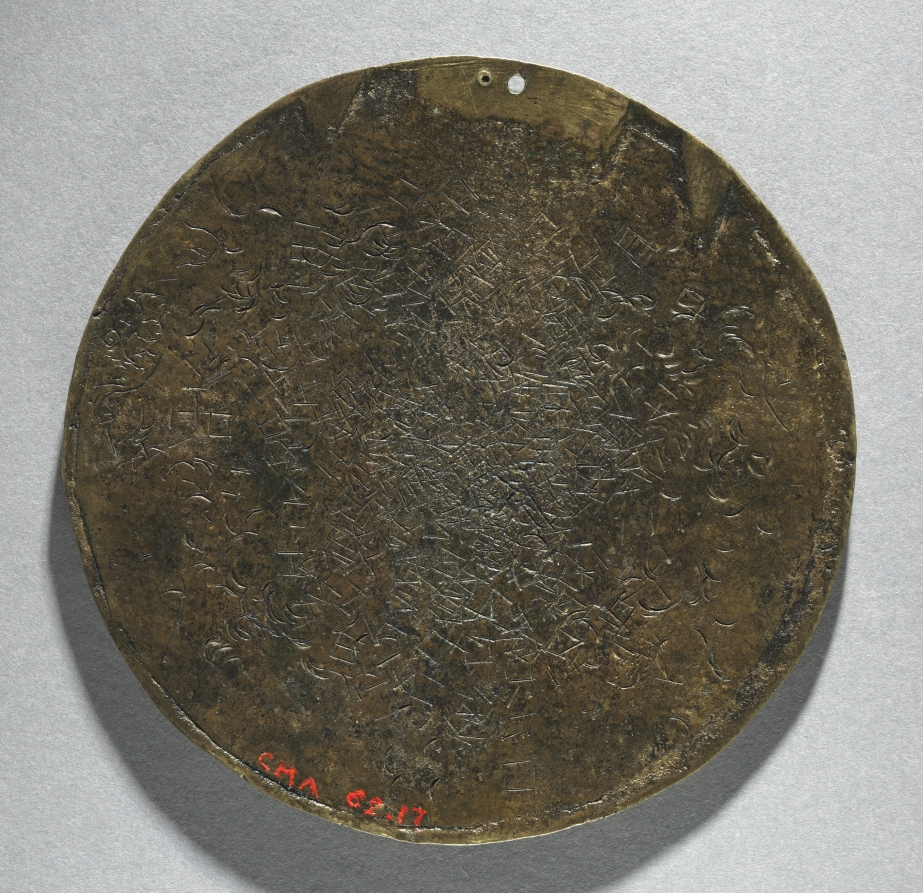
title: The Death of Hippolytus or Fall of Phaeton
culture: Italy, 16th century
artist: Moderno (Italian, 1467–1528)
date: 1500s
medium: bronze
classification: Sculpture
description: This composition's drama comes from the horses' twisting bodies—rhythmically fitting in the circular frame—as well as their dynamic and individuated expressions. Many copies and variants of this popular design exist, some with architectural or wooded backgrounds. Yet, the subject matter is still being debated. The waves along the bottom edge recall two possible classical narratives that relate to bodies of water. First, Hippolytus, sent into exile for the false accusation that he was responsible for his stepmother's death, was killed when Poseidon sent monsters to drown the young man and his chariot in the sea. However, the plaquette has also been connected to Phaeton, the son of Apollo, who attempted to drive the sun god's chariot. Because Phaeton was unable to control the reins, Zeus struck the youth with a bolt of lightning-saving the earth, but hurtling the young boy and horses into the river Eridanos.